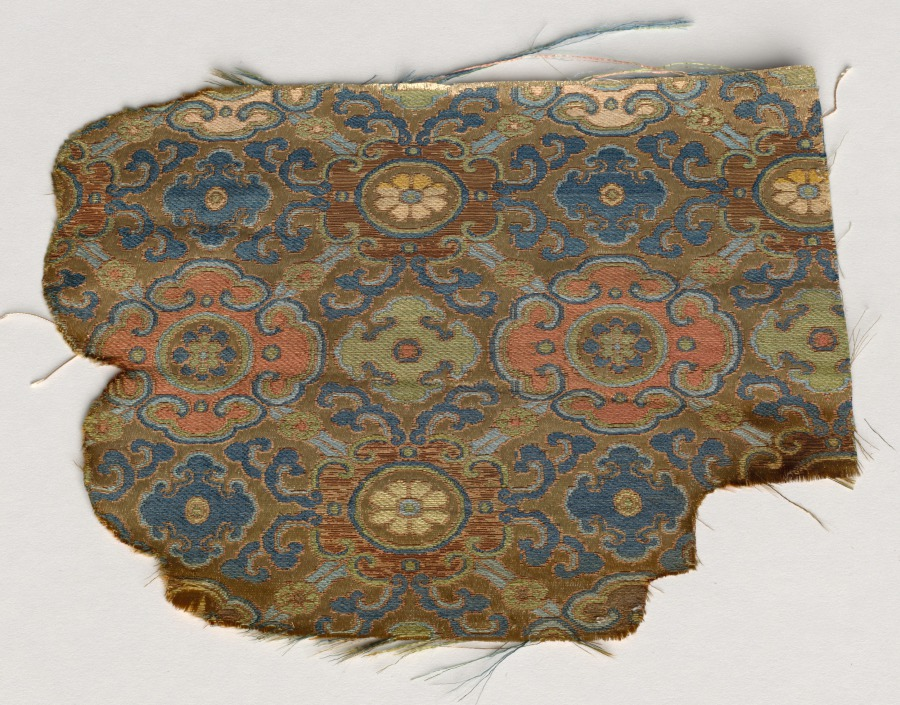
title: Fragment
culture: China, 19th century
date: 1800s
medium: silk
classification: Textile